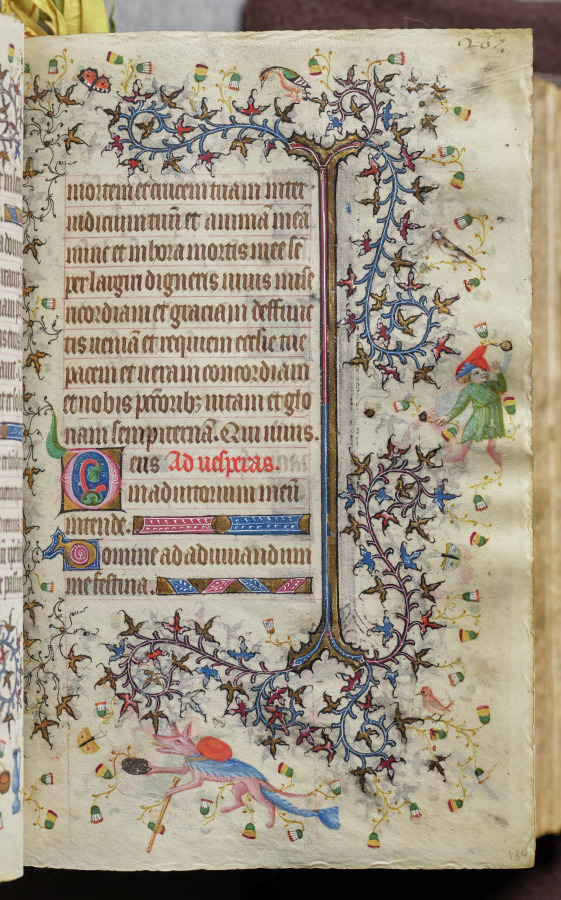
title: Hours of Charles the Noble, King of Navarre (1361-1425): fol. 134r, Text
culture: France, Paris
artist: Master of the Brussels Initials and Associates (French)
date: c. 1405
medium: ink, tempera, and gold on vellum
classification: Bound Volume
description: This precious volume was obviously highly prized by its owner, the French-born King of Navarre, who had his coat of arms painted on no less than twenty folios. Rather than directly commissioning this manuscript from a specific workshop, it seems that Charles the Noble acquired his book of hours -- perhaps ready-made for the luxury market -- while on a trip to Paris in 1404-05. A collaborative effort, six painting styles are evidenced within the pages of this codex, those of two Italians, two Frenchmen, and two Netherlanders. The painter who was responsible for the planning and decoration of the book, and who produced seventeen of the large miniatures, was a Bolognese artist known as the Master of the Brussels Initials. His principal assistant, responsible for most of the borders, was a Florentine who signed his name "Zecho" da Firenze on folio 208 verso.